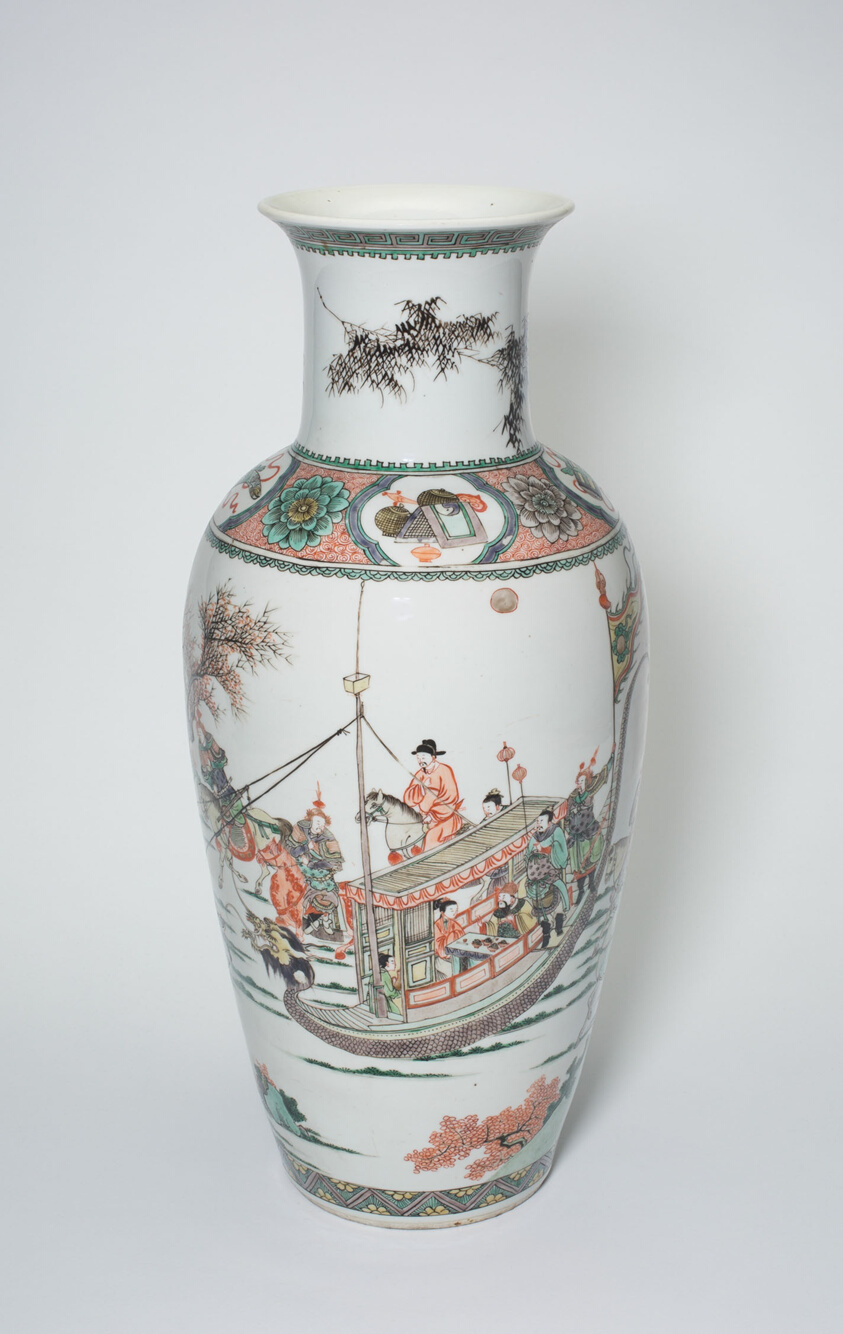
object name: Vessel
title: Vase with Bamboo, Auspicious Symbols, and Military and Civilian Figures in a Landscape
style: Chinese (culture or style)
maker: China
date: Qing dynasty (1644–1911), Kangxi period (1662–1722)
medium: Porcelain painted in overglaze enamels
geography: China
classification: vase; porcelain; vessel; asian art; ceramics